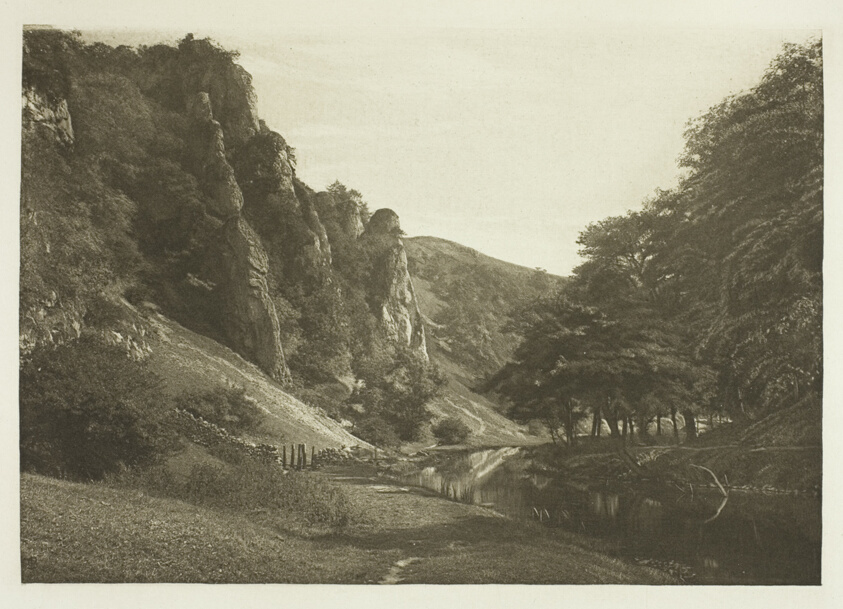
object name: Photograph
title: In Dove Dale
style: 19th century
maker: Peter Henry Emerson (English, born Cuba, 1856–1936)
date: 1880s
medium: Photogravure, plate XLII from the album "The Compleat Angler or the Contemplative Man's Recreation, Volume II" (1888)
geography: England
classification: photogravure; photomechanical process; photography; photograph